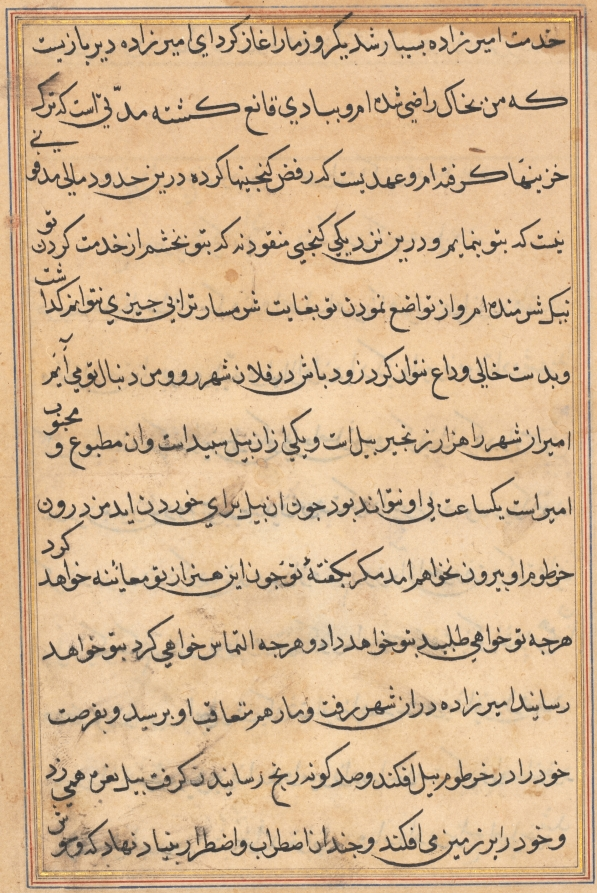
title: Page from Tales of a Parrot (Tuti-nama): text page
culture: Mughal India, court of Akbar (reigned 1556–1605)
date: c. 1560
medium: gum tempera, ink, and gold on paper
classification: Painting